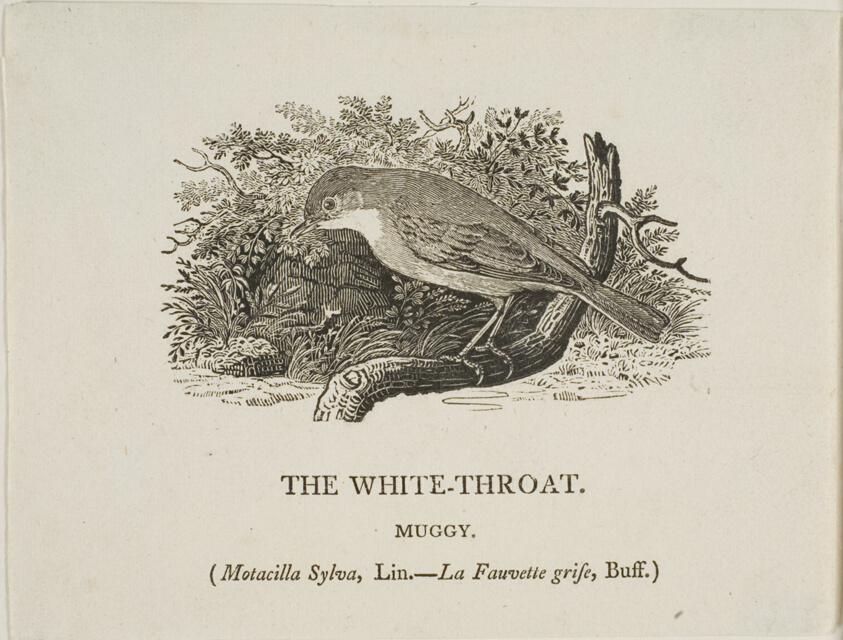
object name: Print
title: White Throat (Bird)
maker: Thomas Bewick (English, 1753-1828)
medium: Woodcut on ivory wove paper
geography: England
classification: relief etching; print; prints and drawing